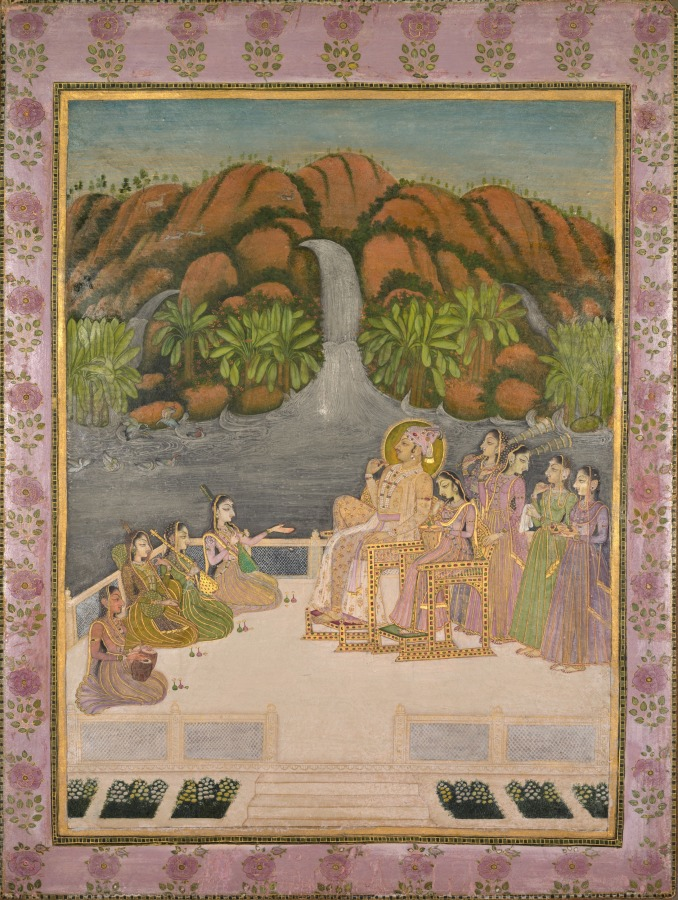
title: Portrait of Sardar Singh (Son of Savant Singh, 1730–68)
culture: Northwestern India, Rajasthan, Kishangarh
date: c. 1760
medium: Gum tempera and gold on paper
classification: Painting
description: The ruler of the princely state of Kishangarh chose to have himself depicted in an intoxicatingly paradisiacal setting. He and his queen occupy jeweled chairs on a white marble terrace with formal flower gardens overlooking a lake. They listen to a musical performance while female attendants stand ready to whisk away flies and serve tiny bottles liquor. The fresh palette and dramatically elongated eyes, especially on the women, are hallmarks of the most celebrated works from this Rajput court. The king is portrayed with less exaggerated features than the women, which makes him seem more human, despite the halo that sets off his face and elaborate turban.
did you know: The ducks, rabbits, and deer in the landscape are in pairs, contributing to the amorous mood.